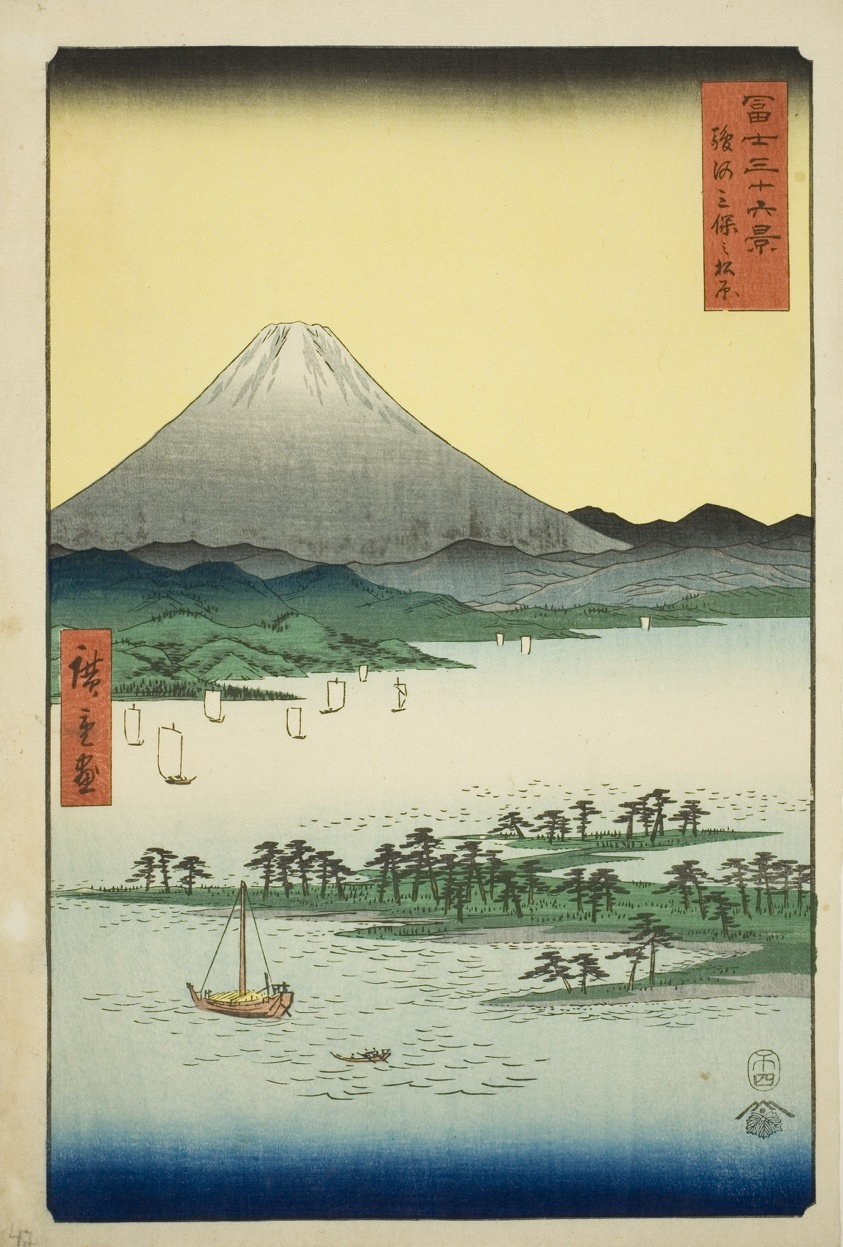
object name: Print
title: Pine Beach at Miho in Suruga Province (Suruga Miho no matsubara), from the series "Thirty-six Views of Mount Fuji (Fuji sanjurokkei)"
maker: Utagawa Hiroshige 歌川 広重; Japanese, 1797-1858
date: 1858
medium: Color woodblock print; oban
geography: Japan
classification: woodblock print; print; asian art